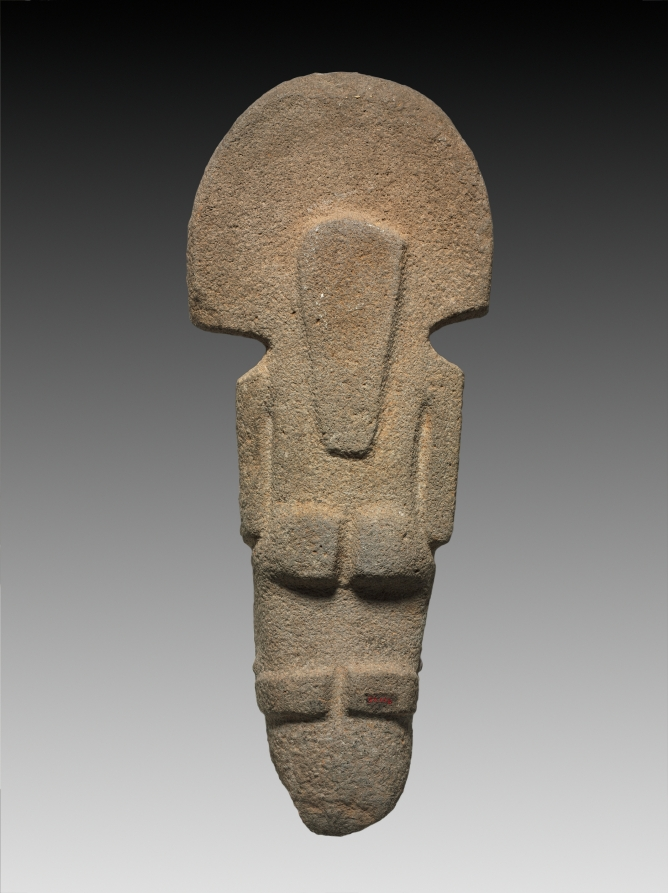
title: Standing Female Figure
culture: Mexico, Gulf Coast, Huastec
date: c. 1000–1500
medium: stone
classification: Sculpture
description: The female depicted in this sculpture wears a serpent-maw headdress—the female’s head appears within the jaws of the serpent, whose eyes can be seen on the “fan” of stone around the head. Many elite Mesoamerican people of the period are shown wearing similar headdresses, suggesting that such sculptures represent noble women. In the past, they have been interpreted as supernatural beings.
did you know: The position of the figure’s hands on her belly may suggest motherhood.